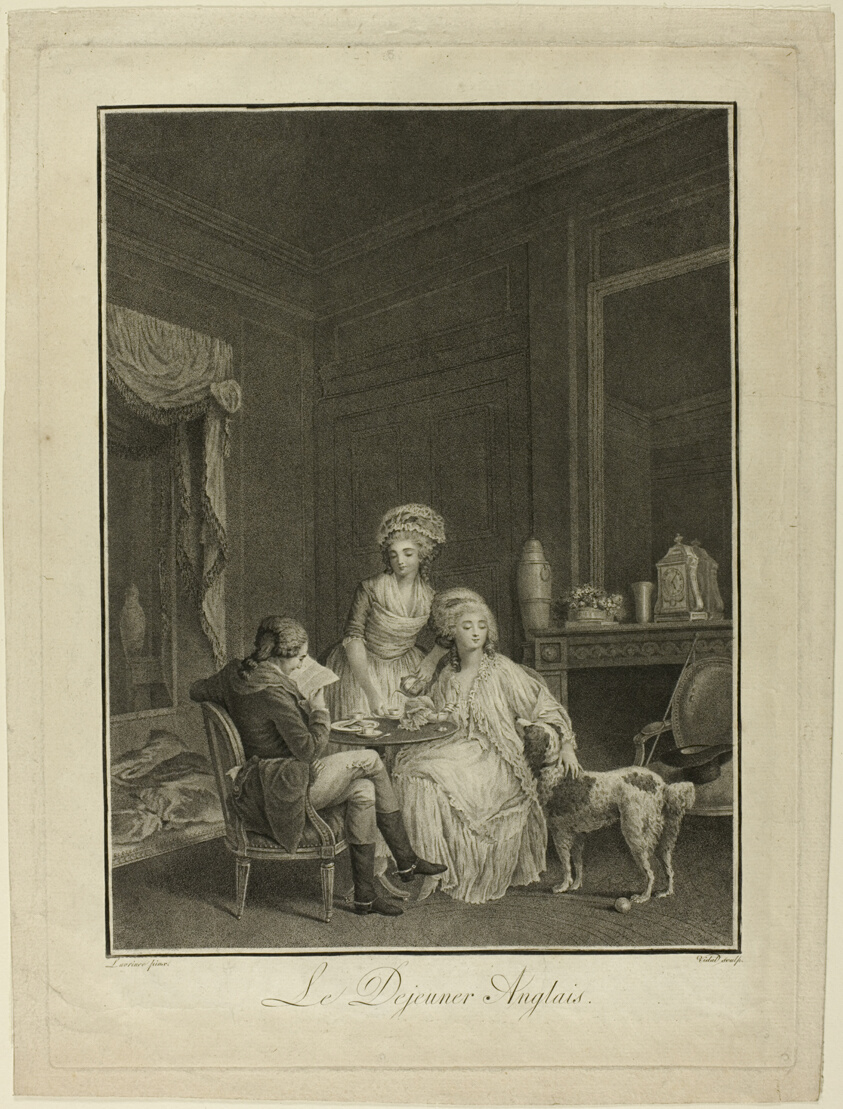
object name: Print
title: English Breakfast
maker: Gérard Vidal (French, 1742-1801); after Nicolas Lavreince (Swedish, 1737-1807)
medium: Etching, with stipple, roulette, and engraving, on cream laid paper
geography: France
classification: etching; print; prints and drawing